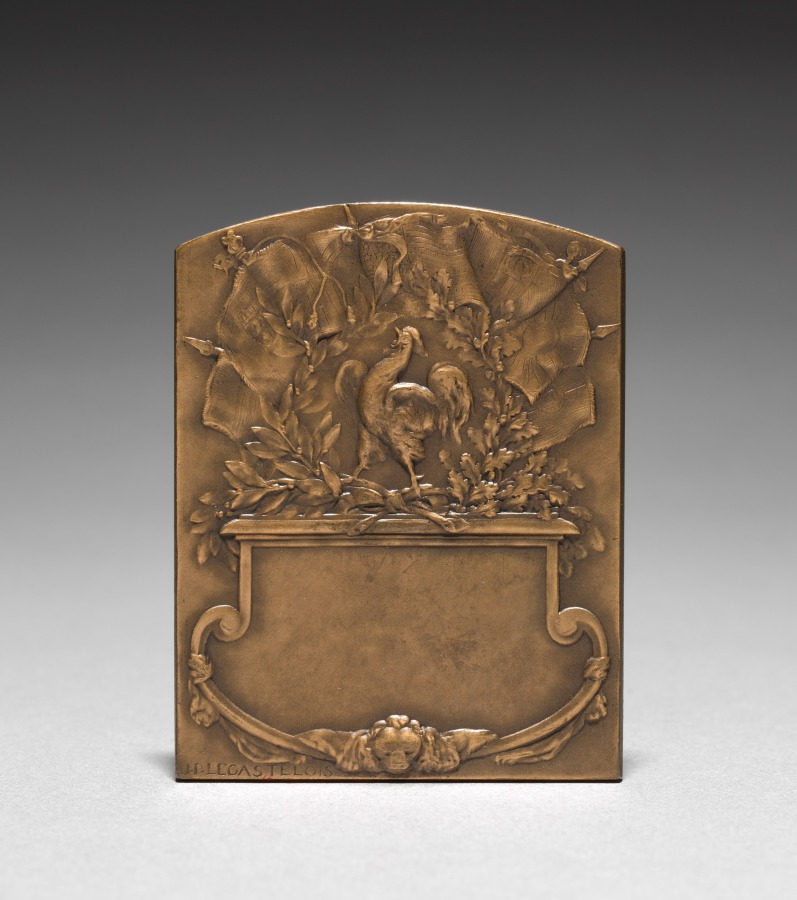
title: Medallion (reverse)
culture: France, 19th-20th century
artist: Jules Prosper Legastelois (French, 1855–1931)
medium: bronze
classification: Metalwork